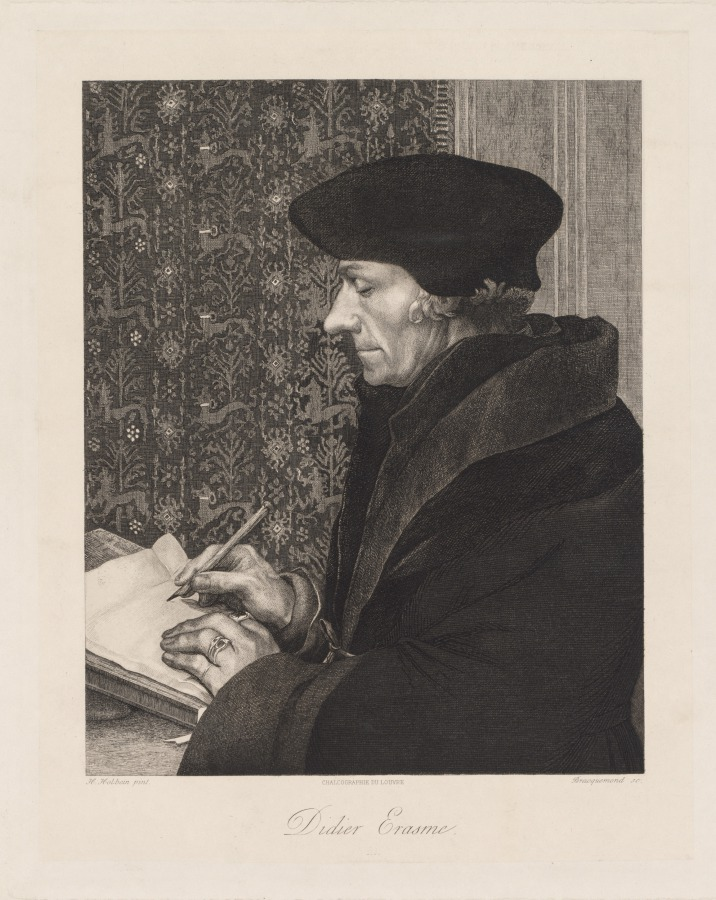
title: Erasmus (Didier Erasme)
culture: France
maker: after Hans Holbein (German, c. 1465–1524)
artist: Félix Bracquemond (French, 1833–1914)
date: 1863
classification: Print